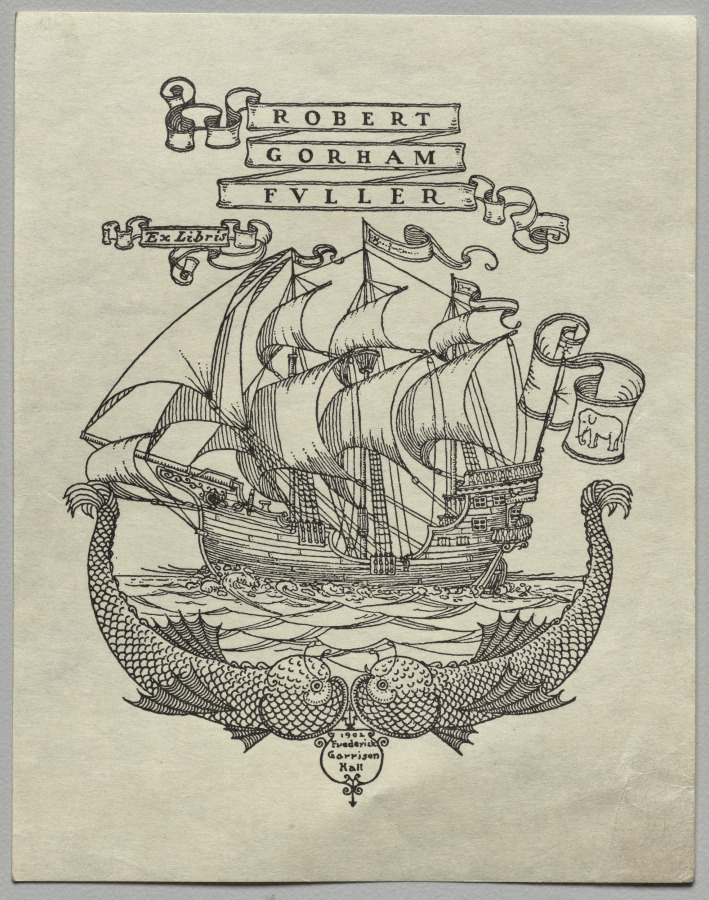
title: Bookplate: Robert Gorham Fuller, Ex Libris inscribed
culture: America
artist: Frederick Garrison Hall (American, 1879–1946)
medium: engraving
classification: Print